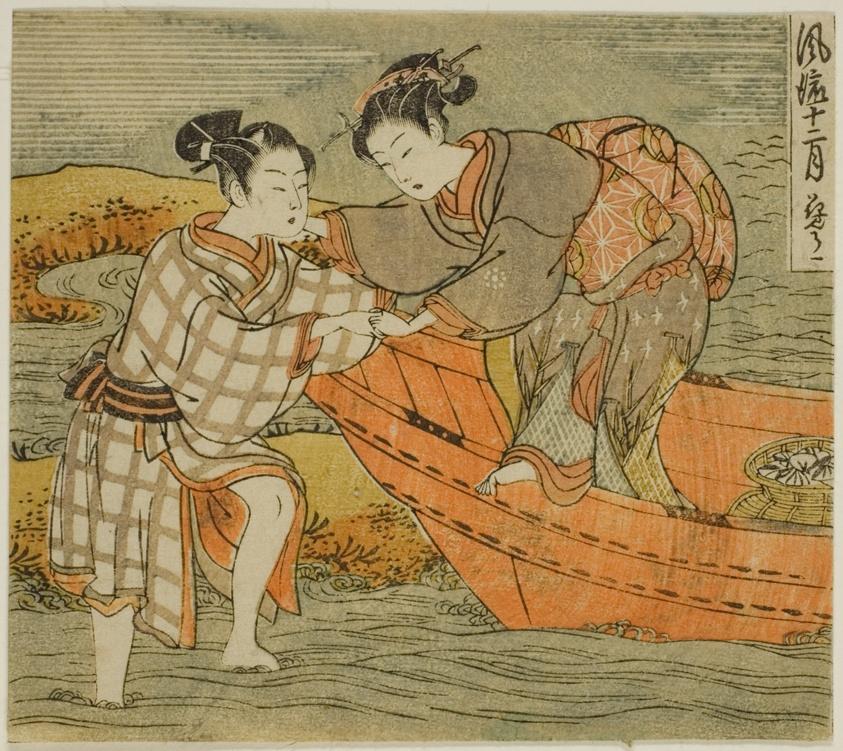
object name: Print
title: The Third Month (Hanamizuki), from the series "Fashionable Twelve Months (Furyu juni tsuki)"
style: Japanese (culture or style)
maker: Isoda Koryusai (Japanese, 1735-1790)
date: c. 1770/72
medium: Color woodblock print; koban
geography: Japan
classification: woodblock print; print; asian art